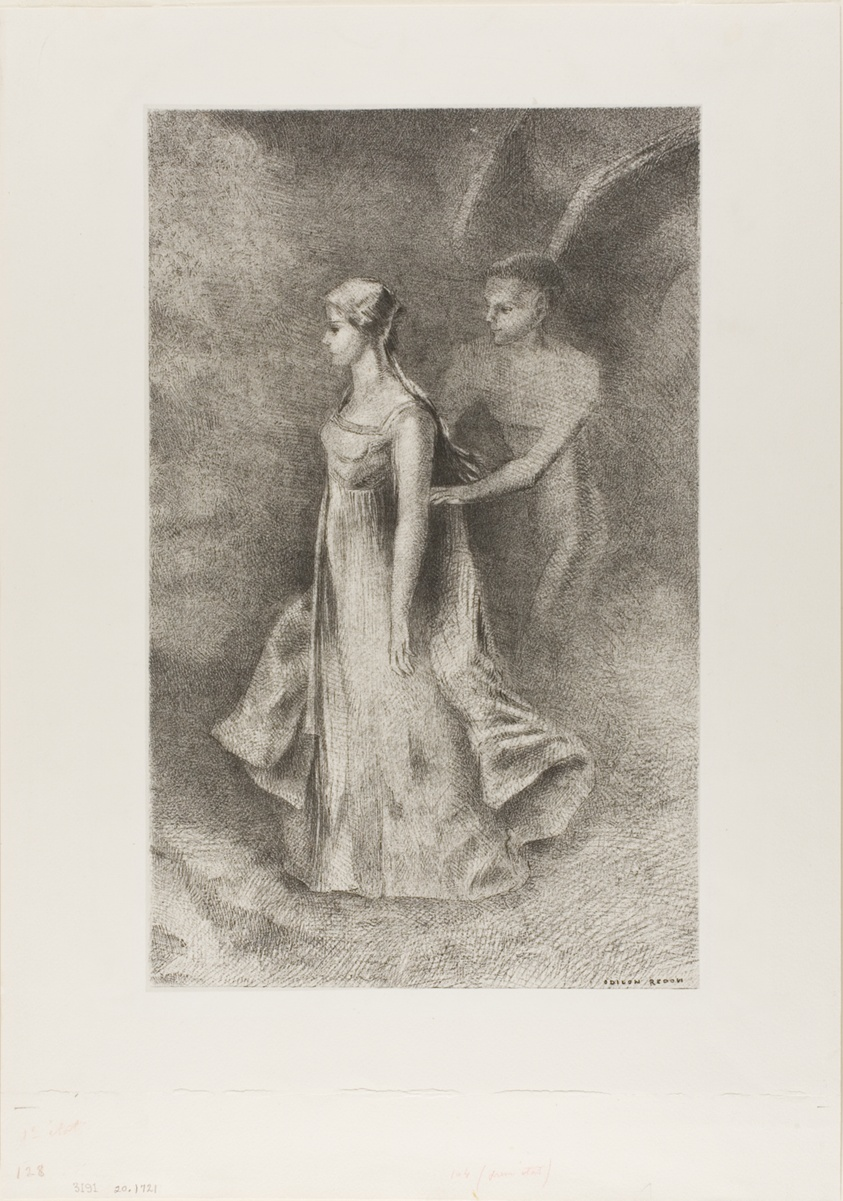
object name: Print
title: Obsession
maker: Odilon Redon (French, 1840-1916)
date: 1894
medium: Lithograph in black on light gray China paper laid down on ivory wove paper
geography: France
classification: lithograph; print; prints and drawing; paper